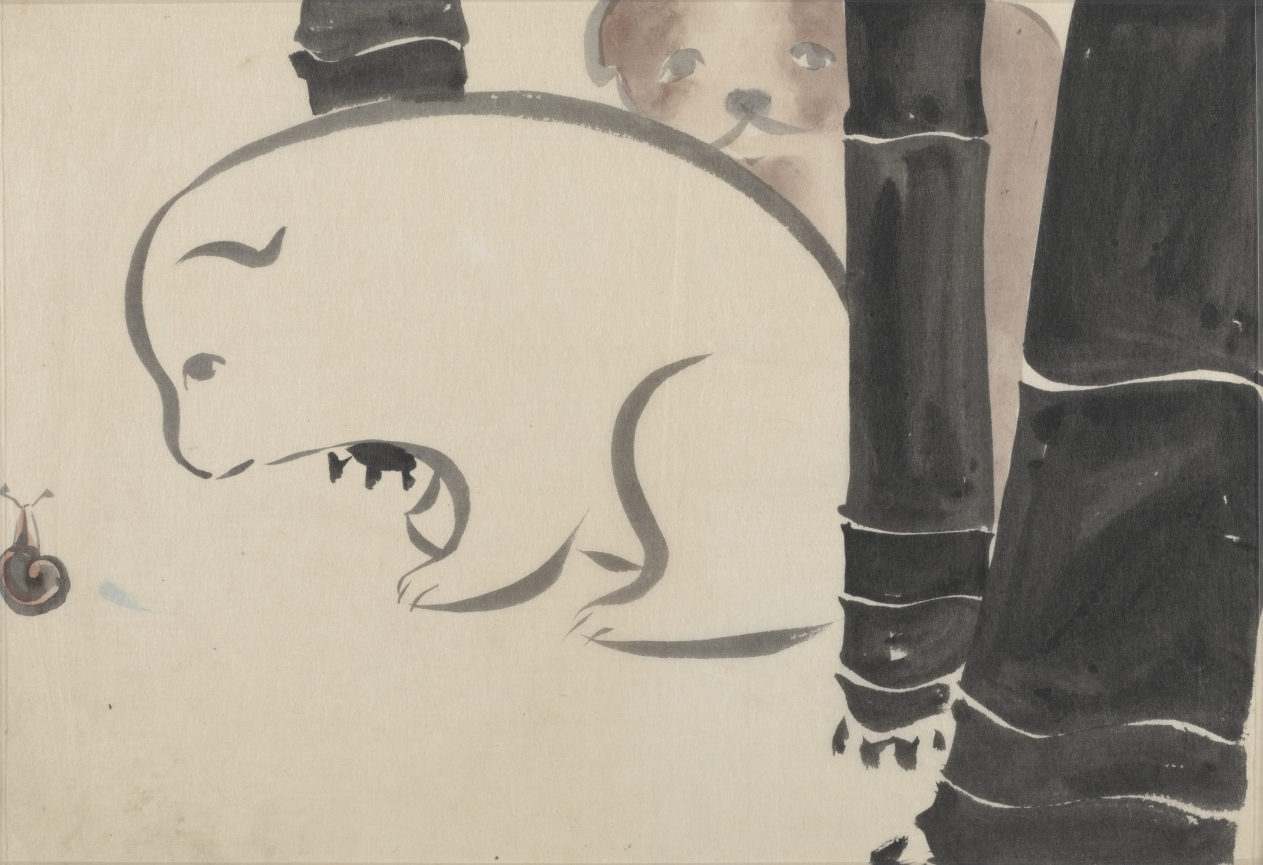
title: Flowers of a Hundred Worlds (Momoyogusa): Puppies (Enokoro)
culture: Japan, Meiji period (1868–1912)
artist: Kamisaka Sekka (Japanese, 1866–1942)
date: 1909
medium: ink and color on paper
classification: Drawing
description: Kamisaka Sekka made preparatory drawings for his Flowers of a Hundred Worlds series on tracing paper with ink and color. The freehand sketches are much looser than the finished, printed compositions.